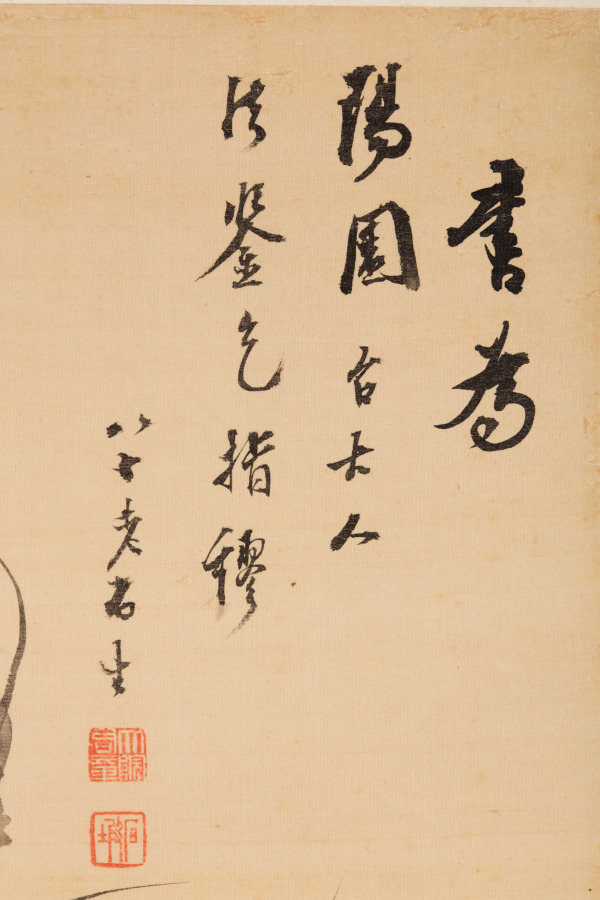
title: Orchids and Rocks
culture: Korea, Joseon dynasty (1392–1910)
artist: Yi Ha-eung (Korean, 1820–1898)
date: 1897–98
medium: Eight-panel folding screen; ink on silk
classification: Painting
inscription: Translation: [I] painted for the high minister Yangwon. [I] humbly request your corrections and advice [on my painting]. [By] an eighty-year old gentleman of rocks.)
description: Yi Ha-eung (1820−1898), the artist of this eight-panel folding screen, was one of the most influential men in late 19th-century Korea. Acting as the regent for his son, King Gojong (1852−1919), who ascended the throne at the age of thirteen, Yi ruled Korea from 1866 to 1873. In addition to his illustrious political career, Yi was also recognized as one of the most celebrated artists who led the revival of literati art in late 19th-century Korean art. In particular, he was recognized as the master of orchids, one of the “Four Gentlemen” (plum, orchid, chrysanthemum, and bamboo) themes. Solely relying on monochrome ink, Yi depicted the curvilinear silhouettes of cymbidium orchid leaves dramatically hanging down from cliffs. Growing in wilderness and redolent with fragrance, orchids were often associated with the perseverance of principled gentlemen, and thus became one of the most popular subjects of scholar-artists' paintings.On the upper right corner of the far left panel, Yi wrote a short inscription stating that he painted the work at the age of 80.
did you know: The artist of this elegant painting is the formidable politician Yi Ha-eung (1820–1898), who is known for a seclusion policy that aimed to protect Korea and its sovereignty from foreign influences.